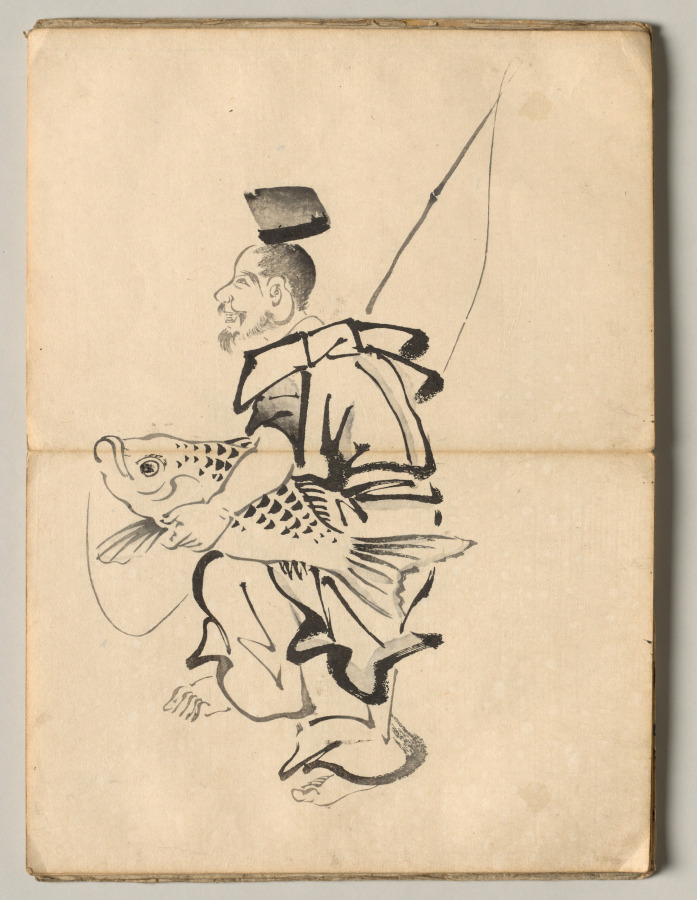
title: Ebisu from Ōkyo Picture Book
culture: Japan, Edo period (1615–1868)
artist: after Maruyama Ōkyo (Japanese, 1733–1795)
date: 1850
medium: accordion-style woodblock printed folding-book; ink and color on paper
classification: Bound Volume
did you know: This impression of a book of woodblock-printed designs is missing a spread that depicts a crane.